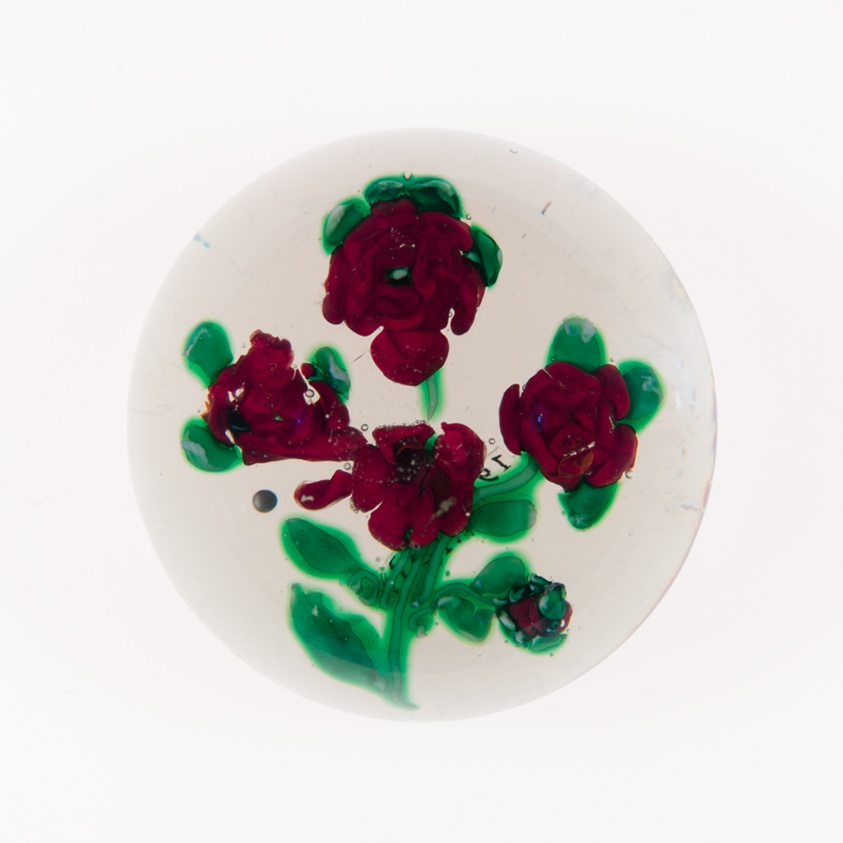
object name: Glass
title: Paperweight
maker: Clichy Glassworks (Cristalleries de Clichy); Clichy, France, 1837-1885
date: 19th century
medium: Glass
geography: Clichy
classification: paperweight; lampwork; european decorative arts; glass